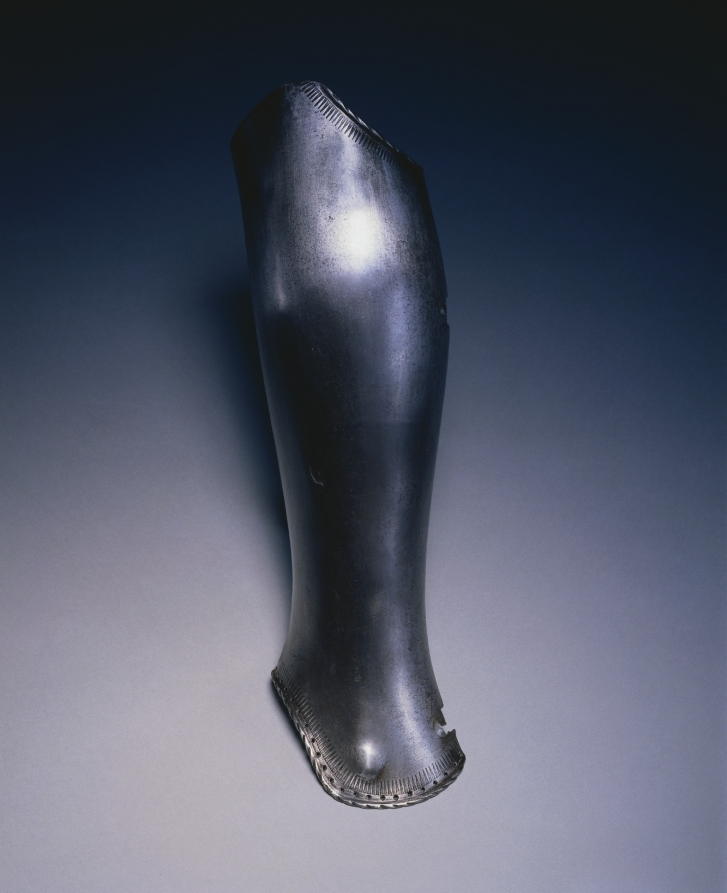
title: Leg Guard (Greave)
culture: Germany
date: 1500s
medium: steelwith roped edge and scroll design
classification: Arms and Armor